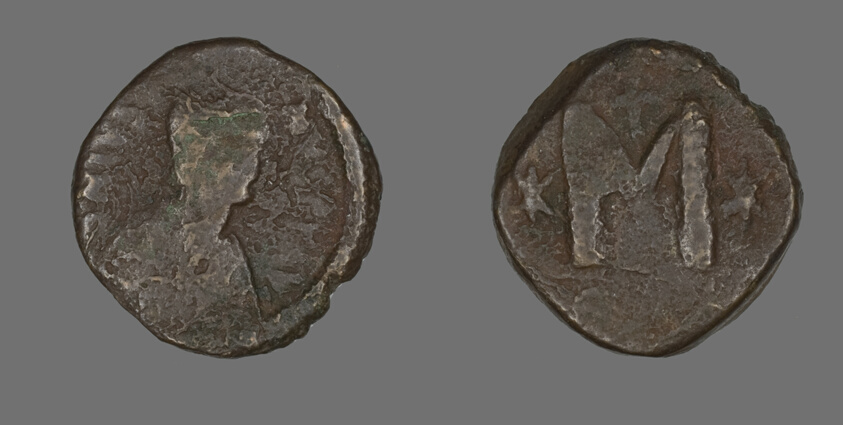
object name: Coin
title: Follis (Coin) Portraying the Emperor Justin I or Justinian I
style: byzantine, european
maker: Byzantine, minted in Constantinople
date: 6th century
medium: Bronze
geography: Istanbul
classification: coin; ancient art